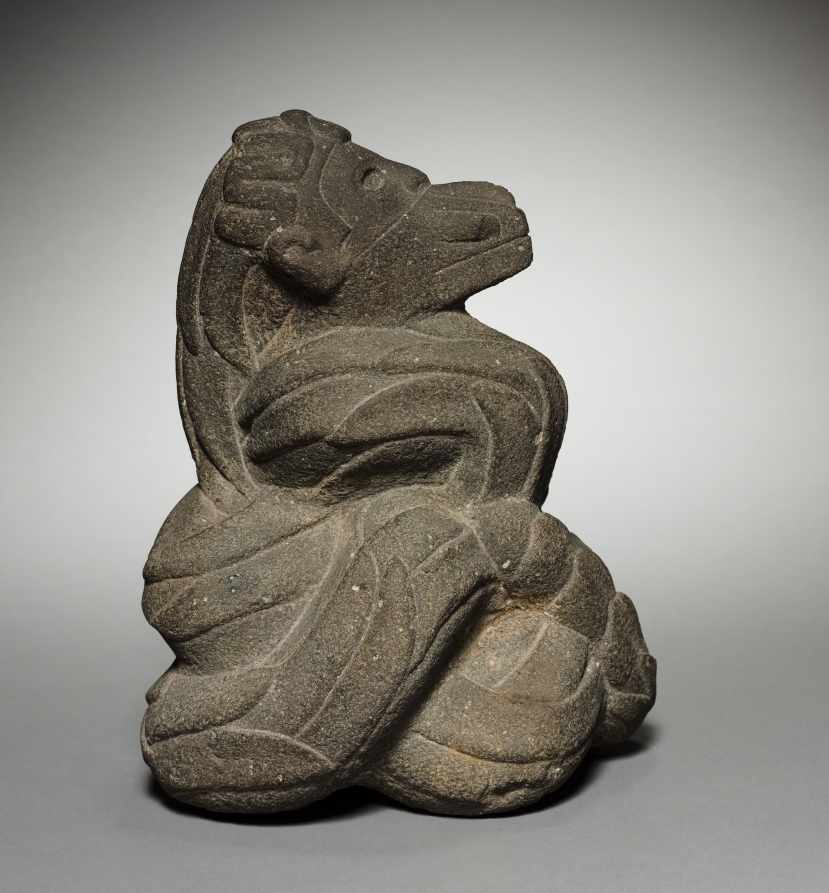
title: Feathered Serpent (Quetzalcoatl)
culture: Central Mexico, Aztec or modern, Post-Classic Period or modern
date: 1325–1521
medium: stone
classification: Stone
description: The museum bought this sculpture in 1941, when study of ancient American arts was in its infancy. It has many odd features, a few perhaps revealing an attempt to make the subject—the Aztec deity Quetzalcoatl (Feathered Serpent)—palatable to modern viewers. But it cannot absolutely be declared fake because some real Aztec sculptures are unusual. Analysis of the surface so far provides no help. Especially odd is the arrangement of the coils into bulges that suggest the pectorals, knees, and buttocks of a human body, as though the sculpture represents a human in a serpent costume. Real Aztec sculpture usually portrays the serpent's dangerous body more realistically. Also, the mouth mask—the insignia of a wind deity related to Quetzalcoatl and, thus, perhaps appropriate—is much larger in genuine sculptures. This suggests that, because the mask and its authentic proportion are strange to our eyes, a forger scaled it down. Other uncommon features include the incomplete carving of the ears, the fact that the human head does not emerge from a serpent's mouth, and more.